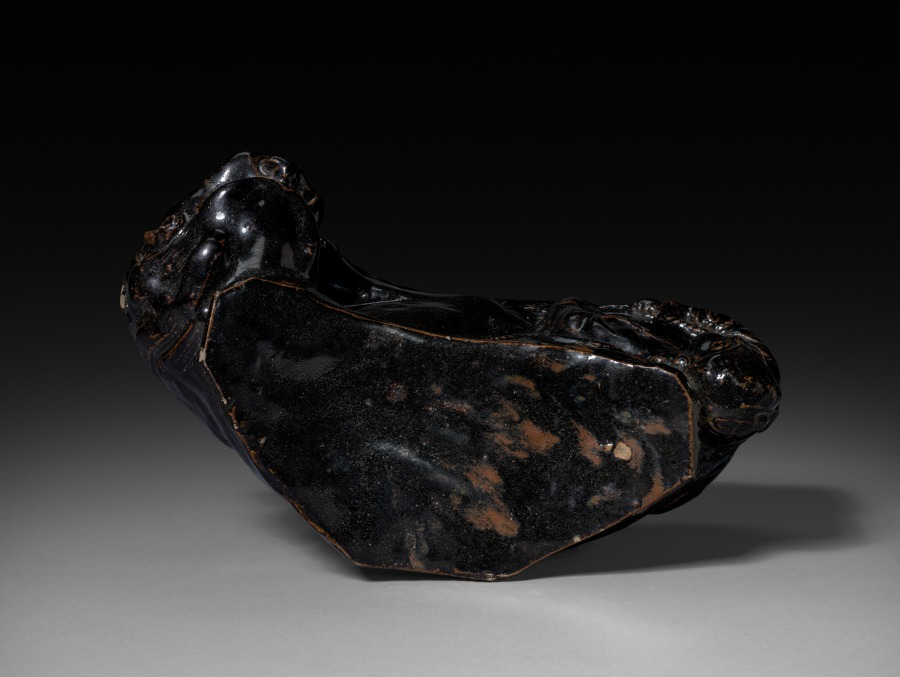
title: Pillow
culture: China, Yuan dynasty (1271-1368)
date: 1100s-1200s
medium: Glazed stoneware, Cizhou ware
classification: Ceramic